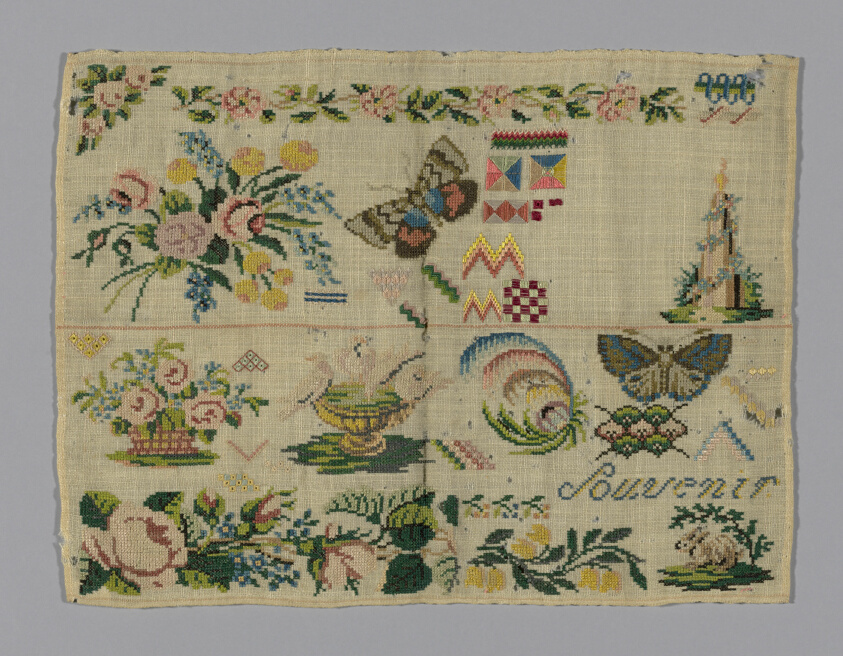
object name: Textile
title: Sampler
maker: Germany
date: 19th century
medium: Wool, plain weave; embroidered with silk yarns in Algerian eye, back, compound cross, cross, double or Smyrna cross, flame, flat, eye, Greek cross filling, herringbone, Jacquard, Rococo, running, satin, and surface satin stitches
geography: Germany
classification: textile; sampler; needlework (visual works)